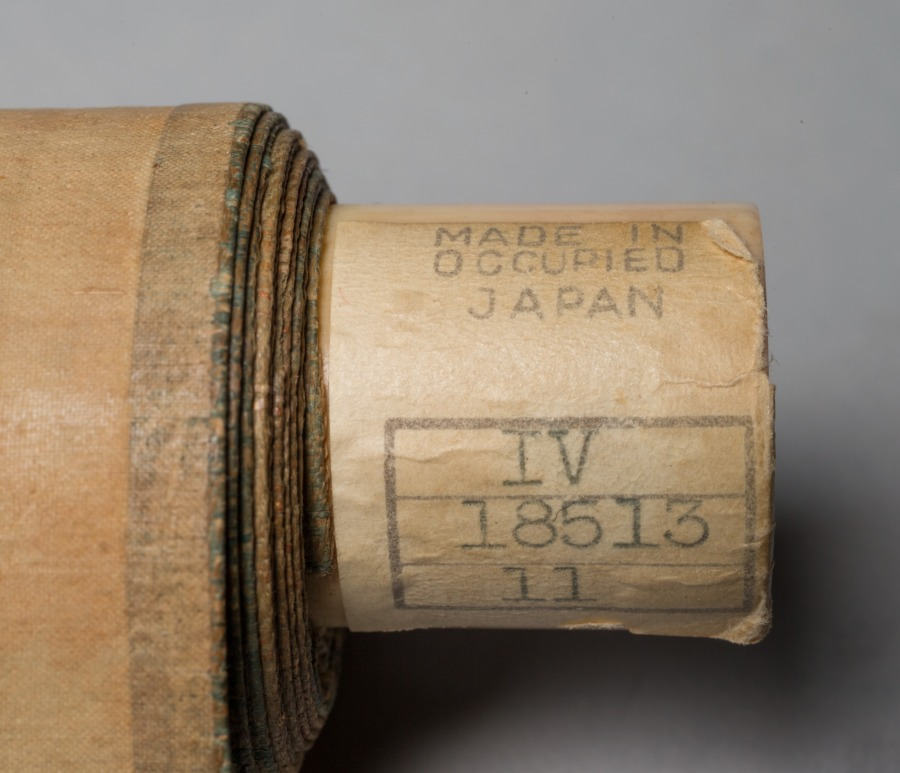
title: Turtle in a Lotus Pond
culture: Japan, Edo period (1615–1868)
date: 1700s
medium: hanging scroll; ink on paper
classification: Painting